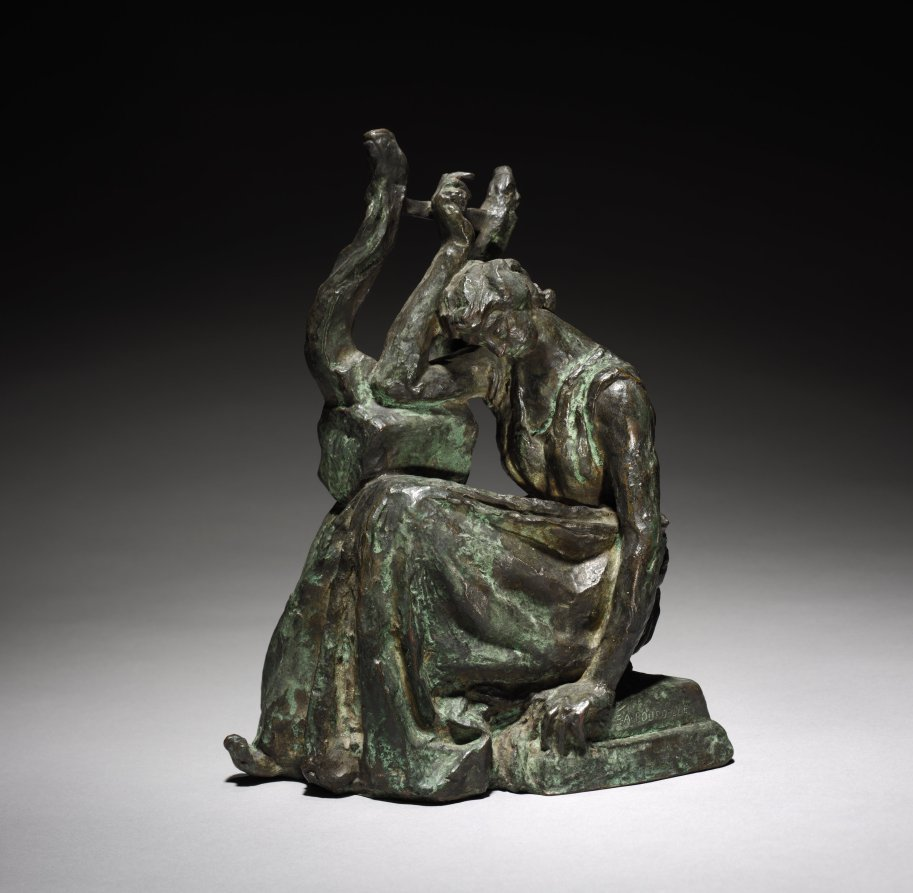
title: Sappho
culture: France, 19th century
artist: Emile Antoine Bourdelle (French, 1861–1929)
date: 1887–1925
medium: bronze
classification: Sculpture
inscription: Inscribed on back: "Alexis Rudier, Fondeur, Paris"; on right side: "E. A. Bourdelle"